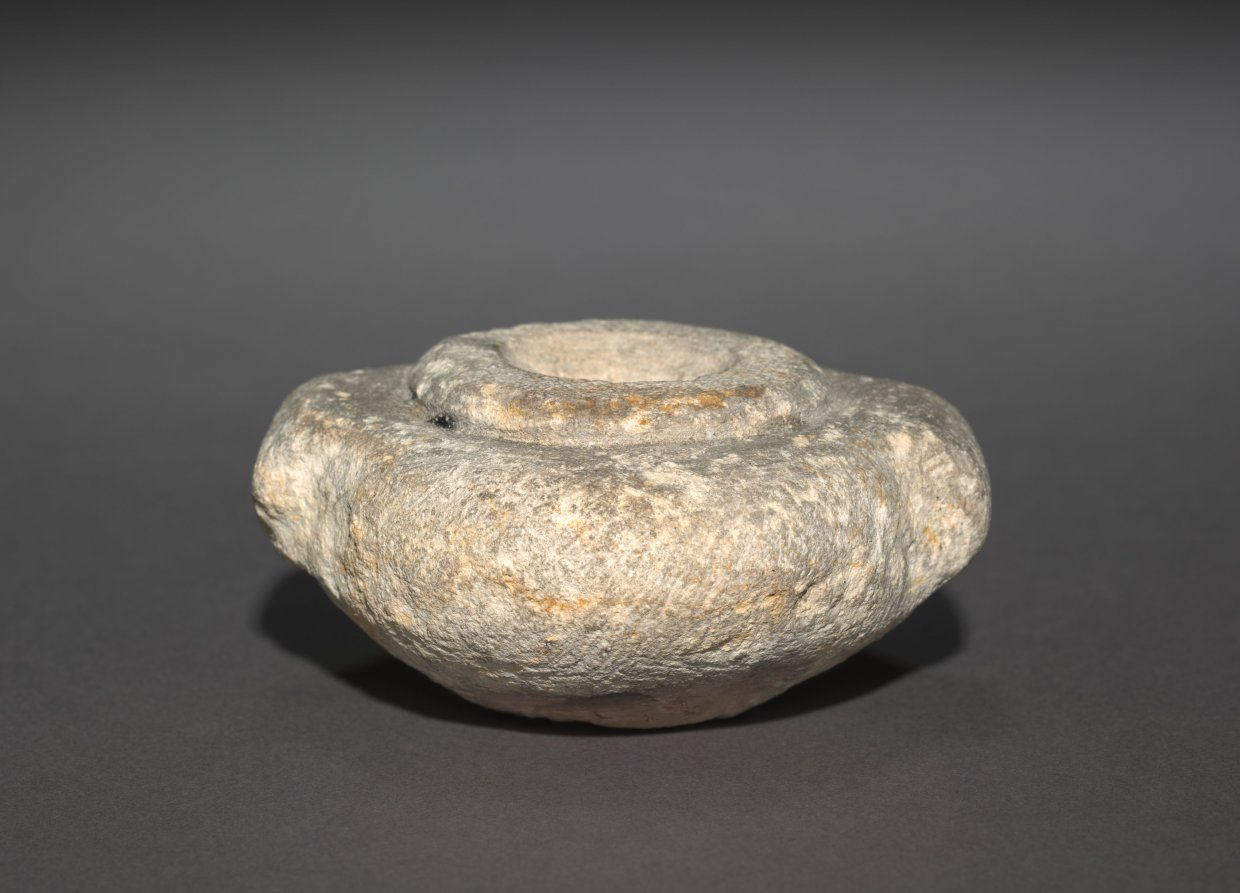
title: Squat Dummy Jar with Lug Handles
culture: Egypt, probably Saqqara, north of the Step Pyramid, excavations of J. E. Quibell, 1910-1911, Early Dynastic (2950–2647 BCE), Dynasties 2–3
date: 2770–2573 BCE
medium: sandstone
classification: Vessels